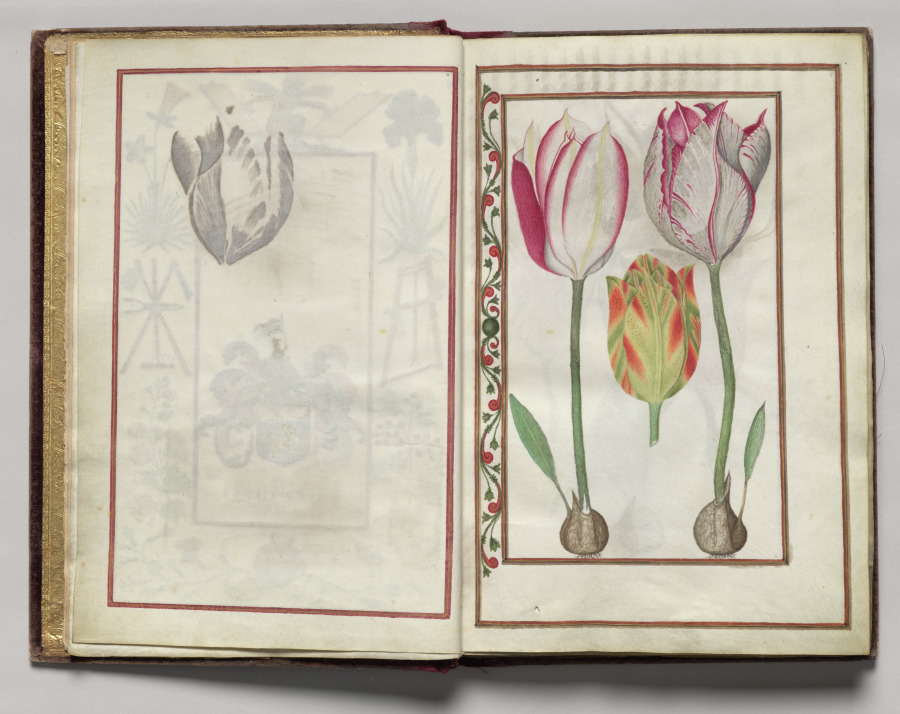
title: Tulips, folio 2 (recto), from Florilegium (A Book of Flower Studies)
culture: France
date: 1608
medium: watercolor, ink, silver, and gold over occasional traces of pencil, on vellum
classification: Bound Volume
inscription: Dated: Poitiers 1608 (on frontispiece) Signed: On frontispiece in black ink, lower right: Van Kuyk Notation on drawing: Frontispiece: in pencil, lower margin: * élève de Van Kessel, peintre flammand (* in pencil also appears in front of Van Kuyk's name).